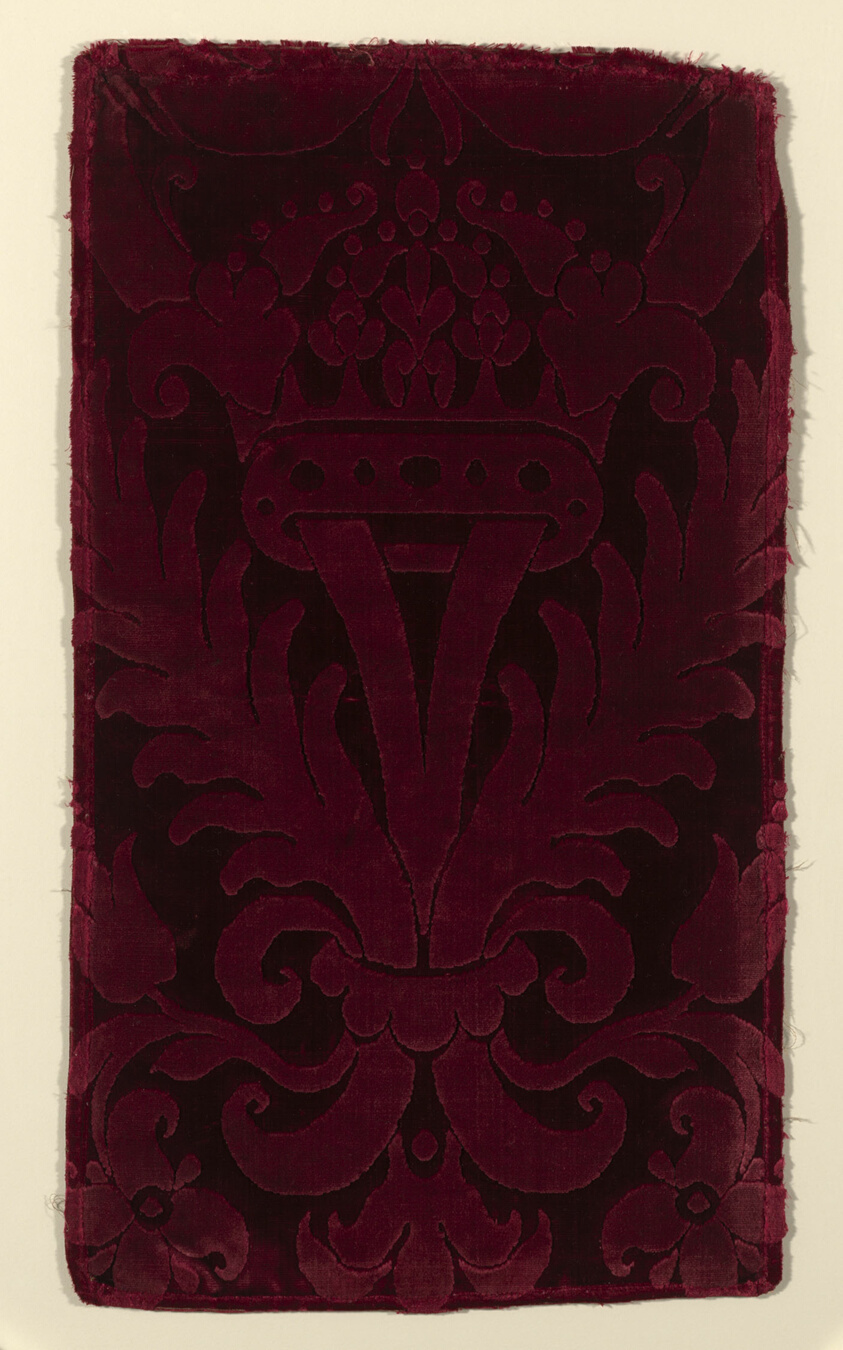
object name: Textile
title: Fragment (Dress Fabric)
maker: Italy, Venice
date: 1501/50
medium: Silk, warp-float faced 3:1 broken warp chevron twill weave with supplementary pile warps forming cut, pile-on-pile solid velvet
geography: Venice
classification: textile; weaving - velvet